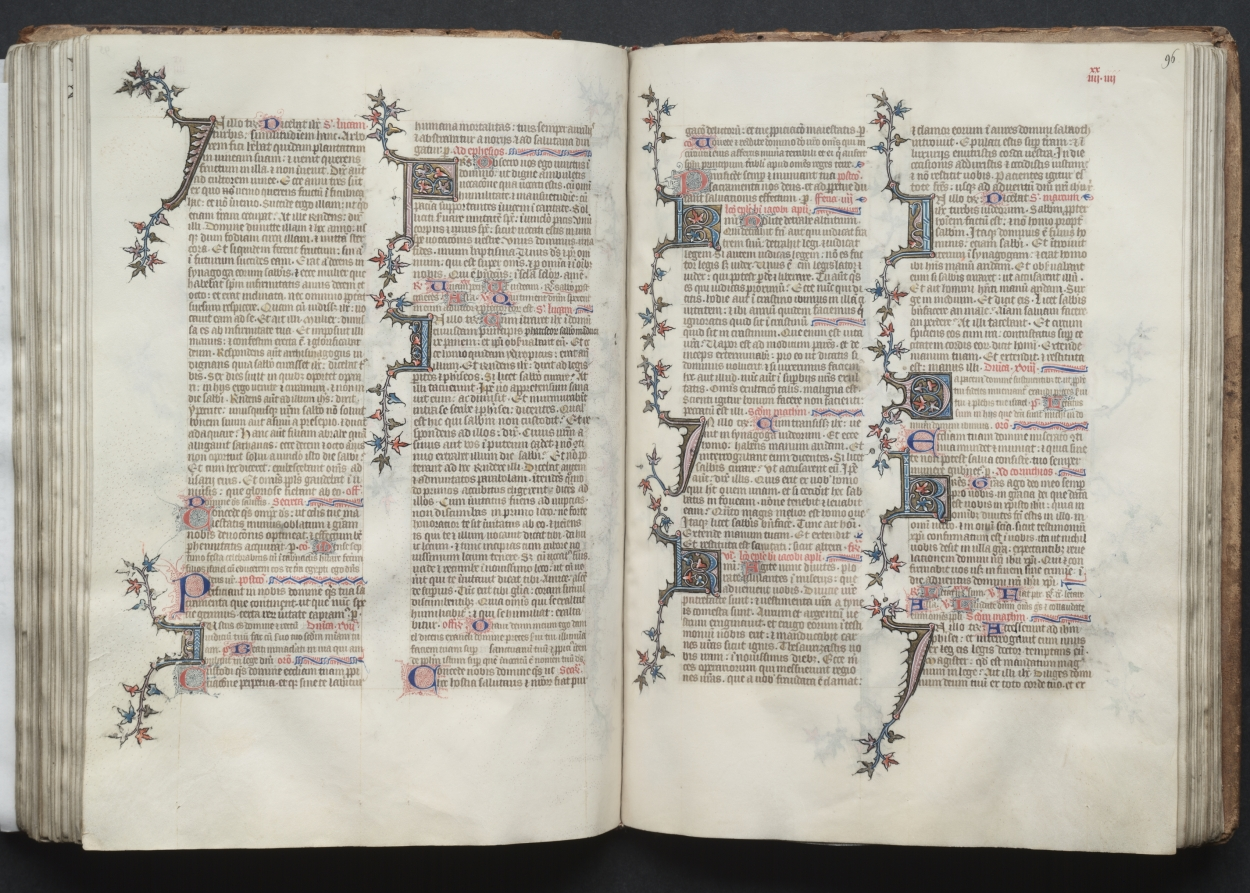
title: The Gotha Missal: Fol. 96r, Text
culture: France, Paris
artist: Master of the Boqueteaux (French)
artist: and Workshop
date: c. 1375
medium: ink, tempera, and gold on vellum; blind-tooled leather binding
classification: Bound Volume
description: The style and quality of this manuscript's decoration is typical of deluxe Parisian books made for aristocratic or royal patrons. Most of the book's decoration appears to be the work of the Master of the Boqueteaux, an artist active at the court of King Charles V (died 1380). His style was apparently shared by a number of book illuminators working in and around Paris. It is very possible that the Gotha Missal belonged to Charles V, but is not provable because the manuscript has no royal portraits and lacks a colophon. Given the book's magnificent decoration, however, it would seem that it was produced for a Valois prince, if not for the king himself. The manuscript receives its name from the German dukes of Gotha, its later owners.